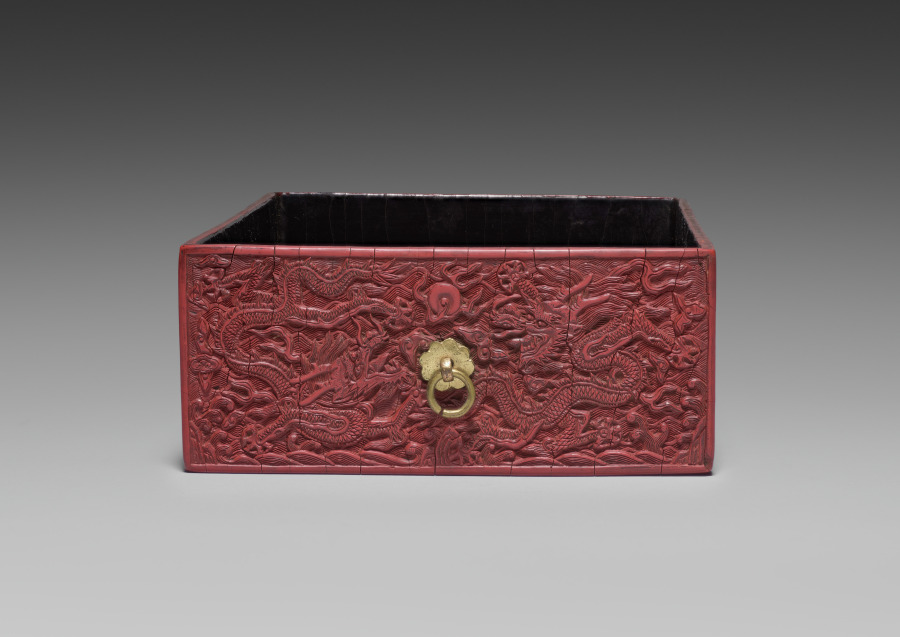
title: Drawer for a Tihong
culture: China, Ming dynasty (1368-1644), Wanli reign (1572-1620)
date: 1585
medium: carved cinnabar lacquer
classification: Lacquer